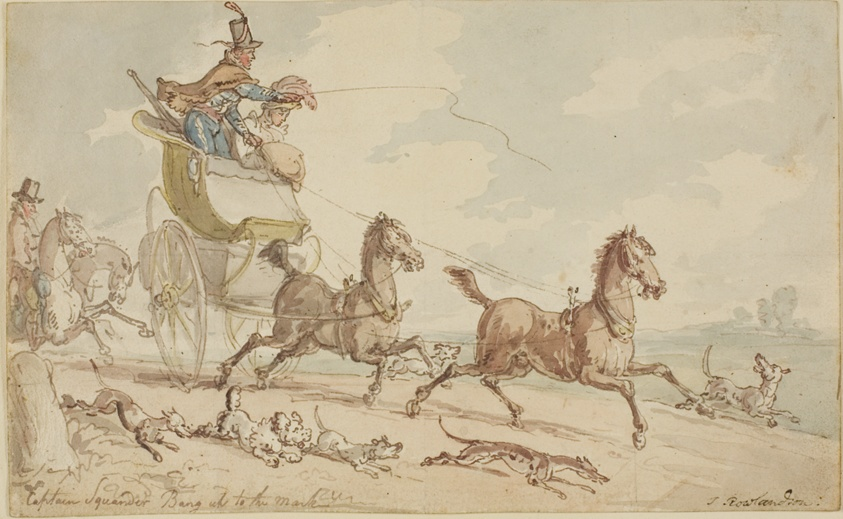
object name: Drawing and Watercolor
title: Captain Squander Bang Up to the Mark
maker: Thomas Rowlandson (English, 1756-1827)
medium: Pen and brown ink with brush and watercolor, over graphite, on cream wove paper, tipped onto cream wove paper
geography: England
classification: watercolor; drawings (visual works); prints and drawing